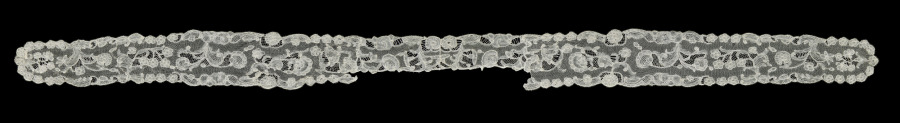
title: Lace Edging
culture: Belgium, Brussels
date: 1700s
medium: Linen: bobbin lace (Point d'Angleterre)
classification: Lace